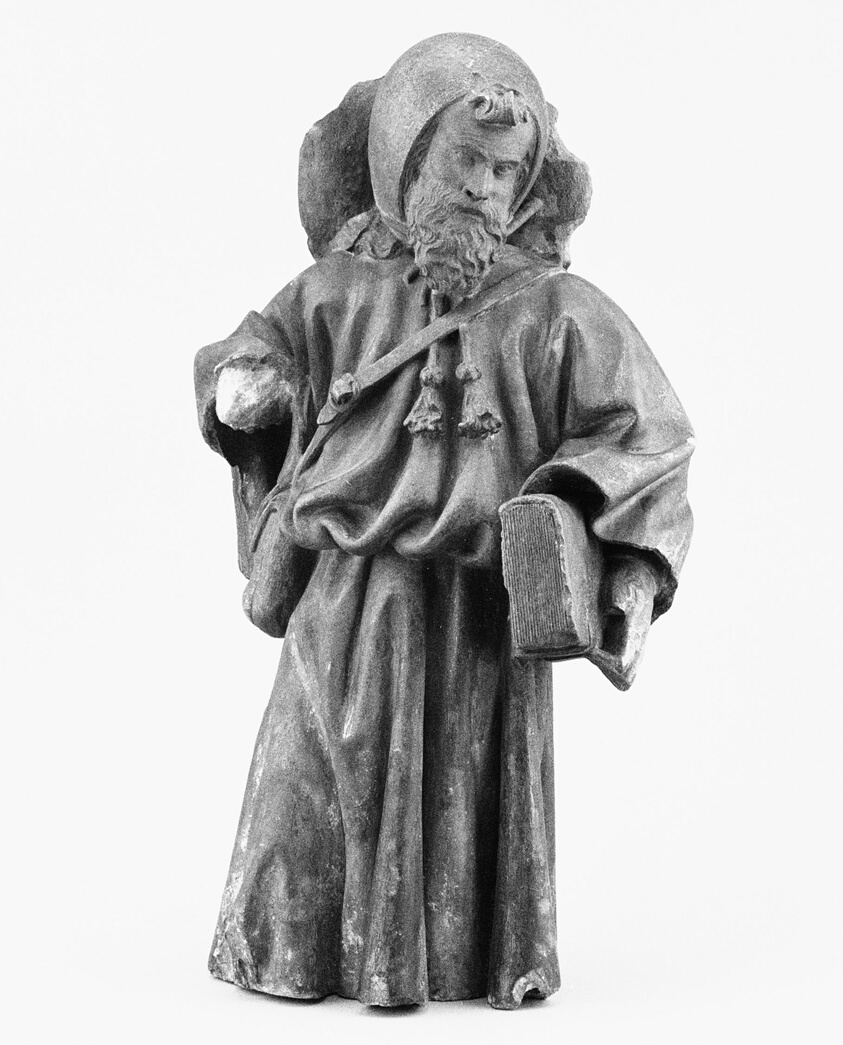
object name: Sculpture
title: Saint James the Great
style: 15th century, 16th Century, Renaissance, sixteenth century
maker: Northern French or South Netherlands, Tournai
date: 1450–1500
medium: Limestone, traces of paint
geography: France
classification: statuette; sculpture; dutch; flemish; french; limestone; paint; sculpture/stone; stone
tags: saints, tassels, bibles, book, Christianity, Christian subjects, religious figures, religious, religion, man